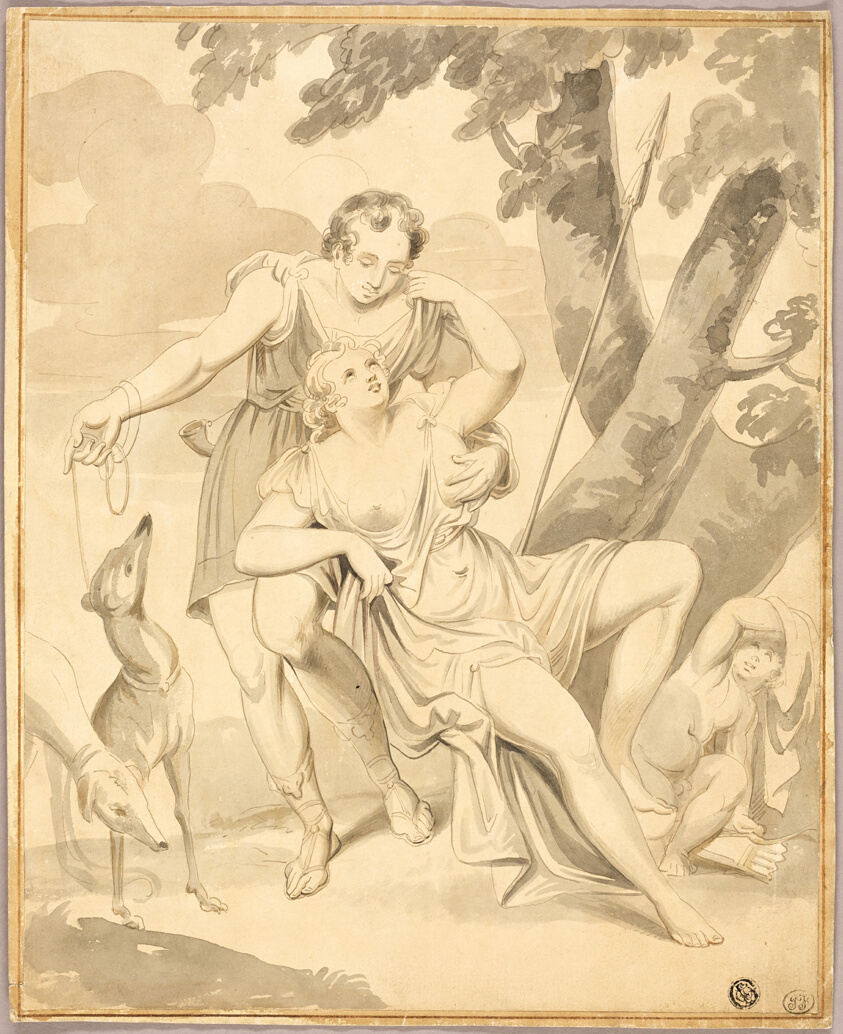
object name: Drawing and Watercolor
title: Venus and Adonis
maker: Style of Conrad Martin Metz (English, born Germany, 1749-1827); or Giovanni Battista Cipriani (Italian, 1727-1785)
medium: Pen and black and brown ink, with brush and brown and black wash, on cream laid paper, laid down on cream laid paper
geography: England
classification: pen and ink drawings; paper; drawings (visual works); prints and drawing